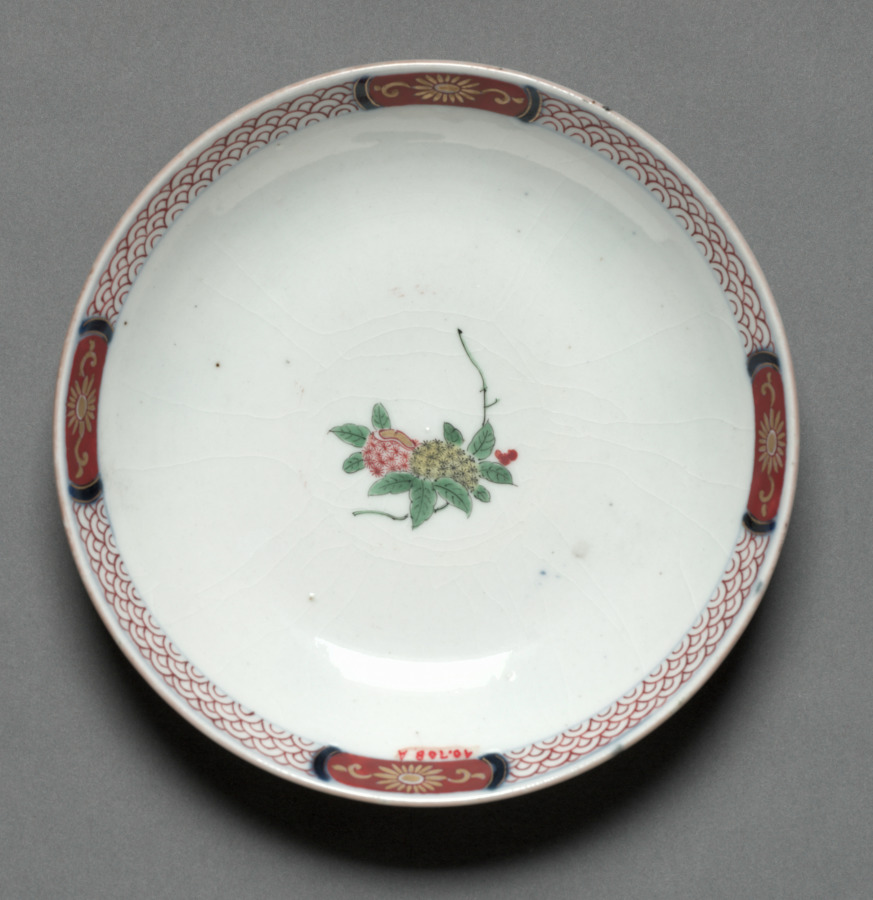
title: Covered Bowl (lid)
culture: Japan, Edo period (1615–1868)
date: early to mid-1800s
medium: white porcelain with underglaze blue, overglaze enamel and gold decoration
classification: Ceramic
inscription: four characters in blue circle on base, translate as: "Wealth Long Spring."